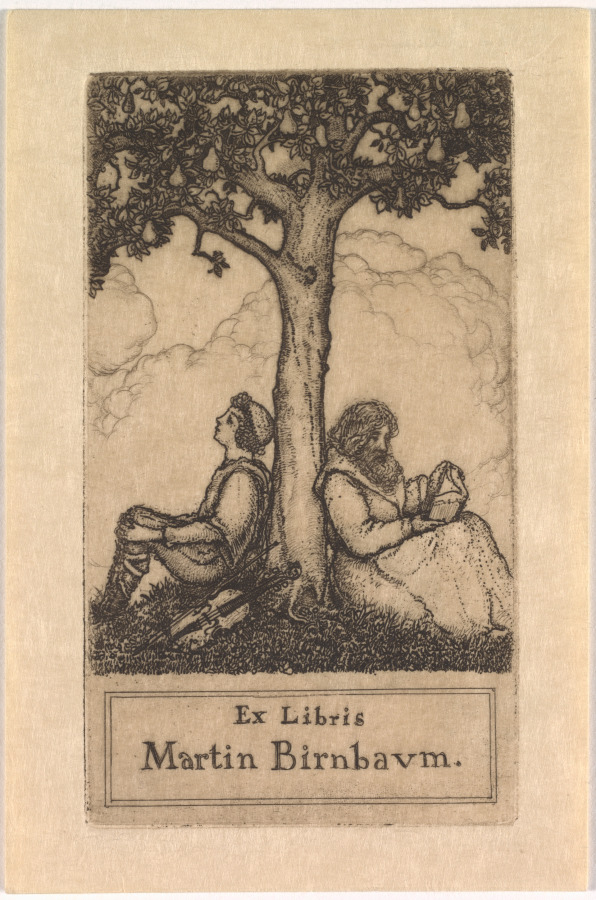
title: Bookplate of Martin Birnbaum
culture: America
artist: Ernest Haskell (American, 1876–1925)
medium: etching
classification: Print